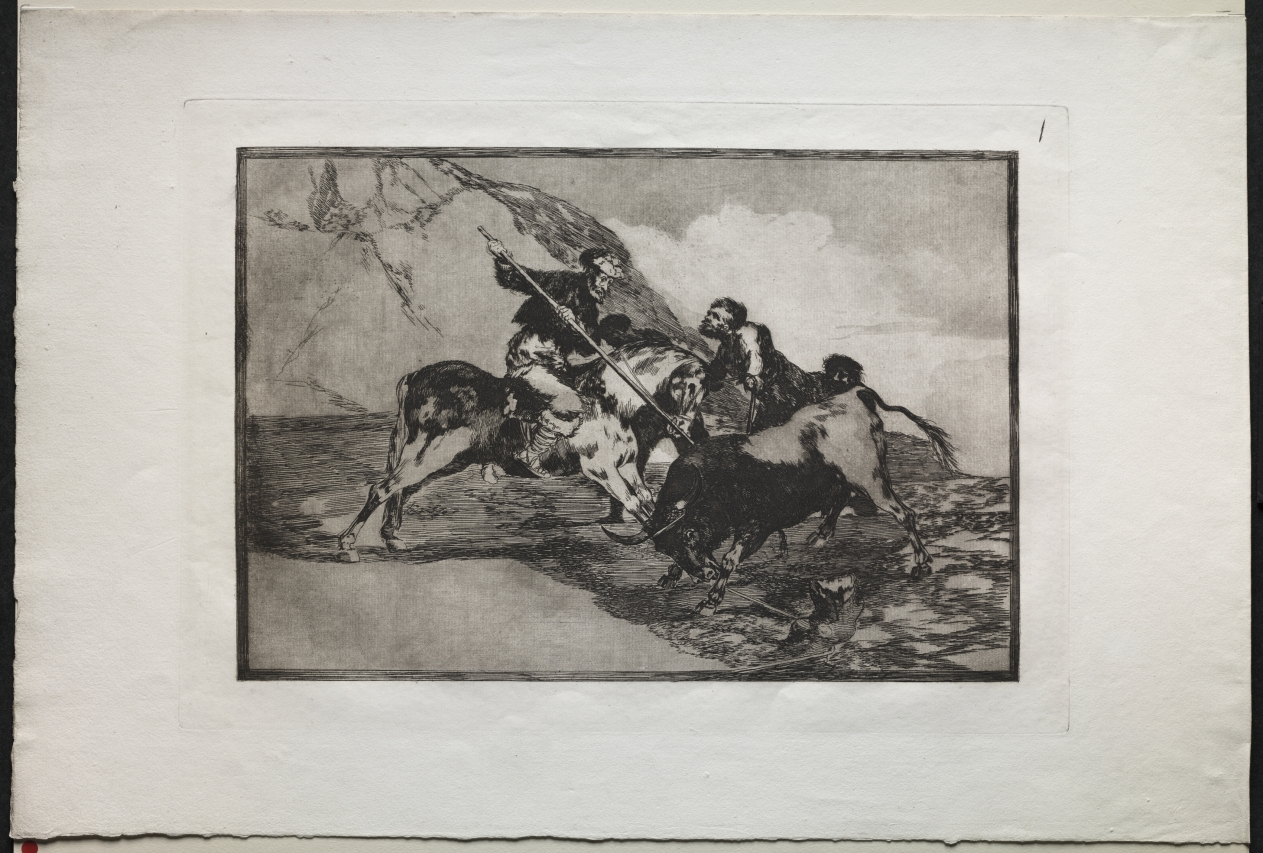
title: Bullfights: The Way in Which the Ancient Spaniards Hunted Bulls on Horseback in the Open Country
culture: Spain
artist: Francisco de Goya (Spanish, 1746–1828)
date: 1816, printed 1876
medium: engraving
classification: Print